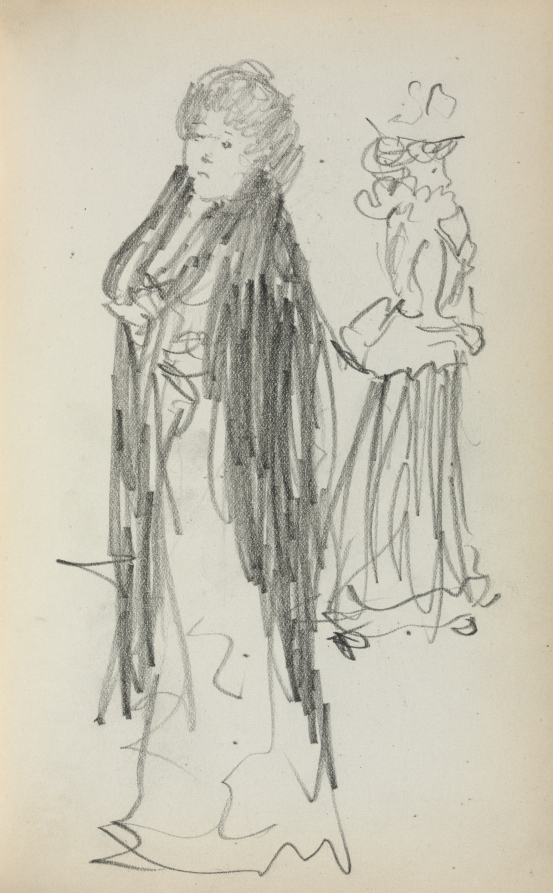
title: Italian Sketchbook: Two Standing Women (page 129)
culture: America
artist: Maurice Prendergast (American, born Newfoundland [now Canada], 1858–1924)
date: 1898–1899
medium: pencil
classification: Bound Volume